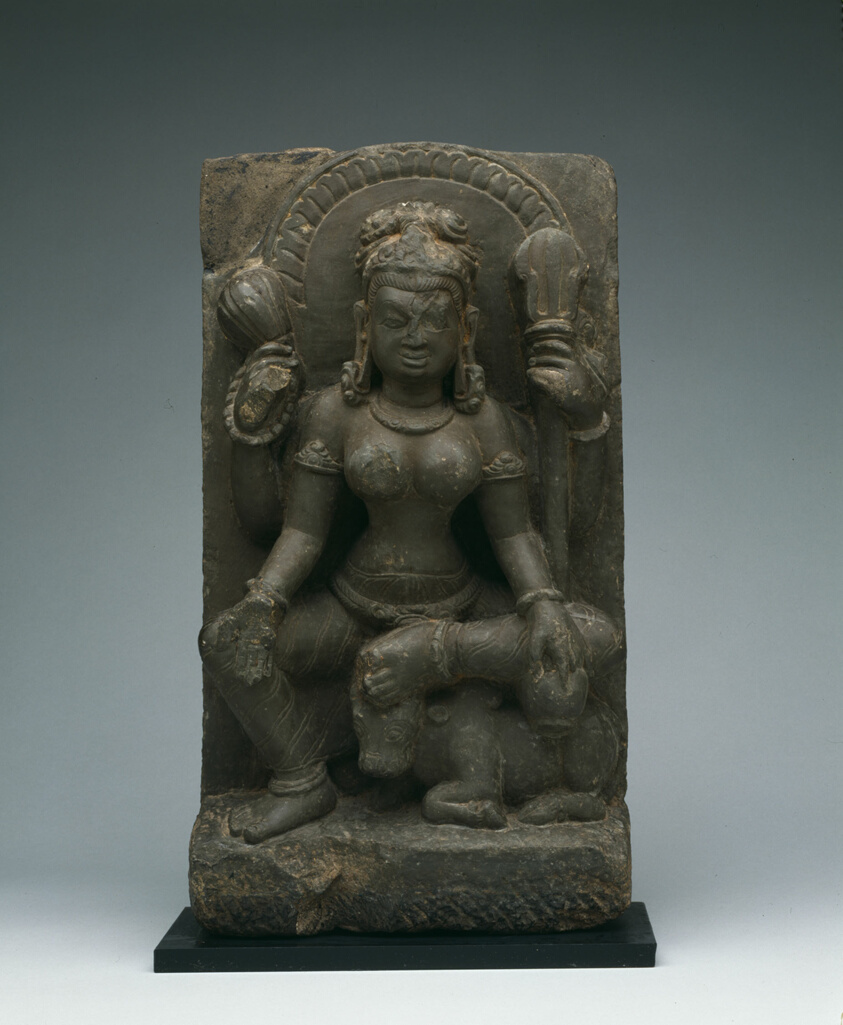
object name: Sculpture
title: Mother Goddess Maheshvari Seated on the Bull Nandi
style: South Asian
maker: India; Uttarakhand, Almora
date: 10th/11th century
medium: Greenish gray schist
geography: Uttaranchal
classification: schist; stone; sculpture; asian art